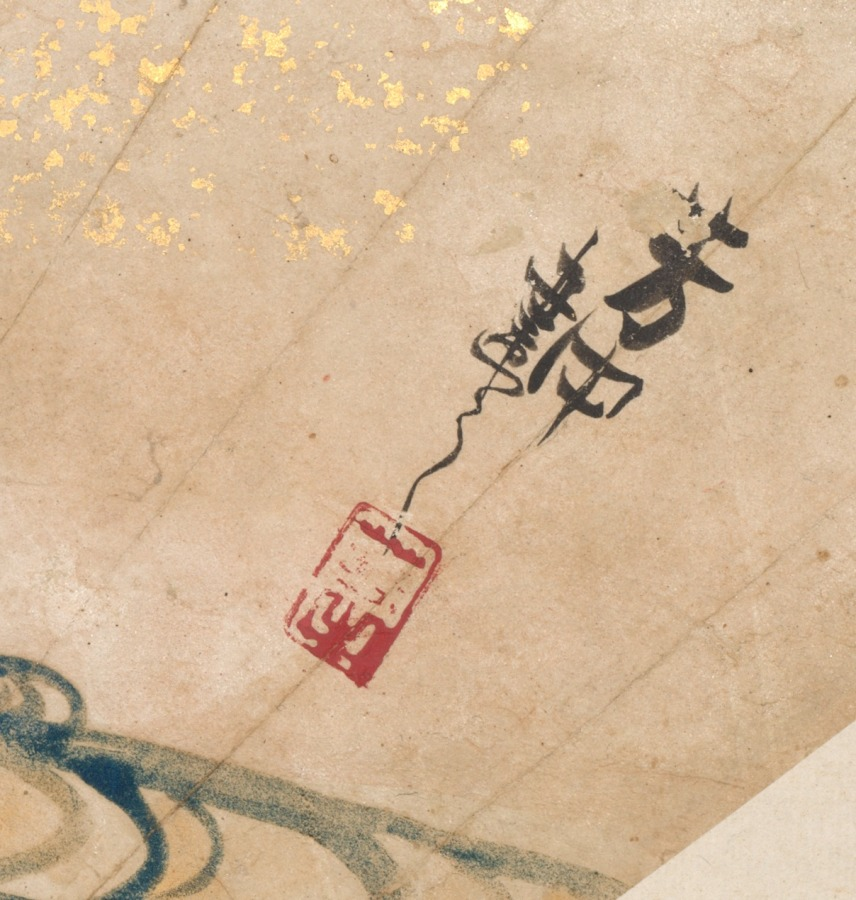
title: Waves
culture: Japan, Edo period (1615–1868)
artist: Nakamura Hōchū (Japanese, d. 1819)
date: late 1700s-early 1800s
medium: fan painting mounted as a hanging scroll; ink and color with gold on paper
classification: Painting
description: Nakamura Hōchū painted waves on this handheld fan to bring coolness to the mind of its bearer. While fragile paper fans are often used for a single season, this one was cherished for its design. Someone carefully removed it from its folding apparatus and converted it into a hanging scroll for occasional enjoyment in an alcove.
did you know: Nakamura Hōchū took inspiration for his work from the painter Ogata Kōrin.